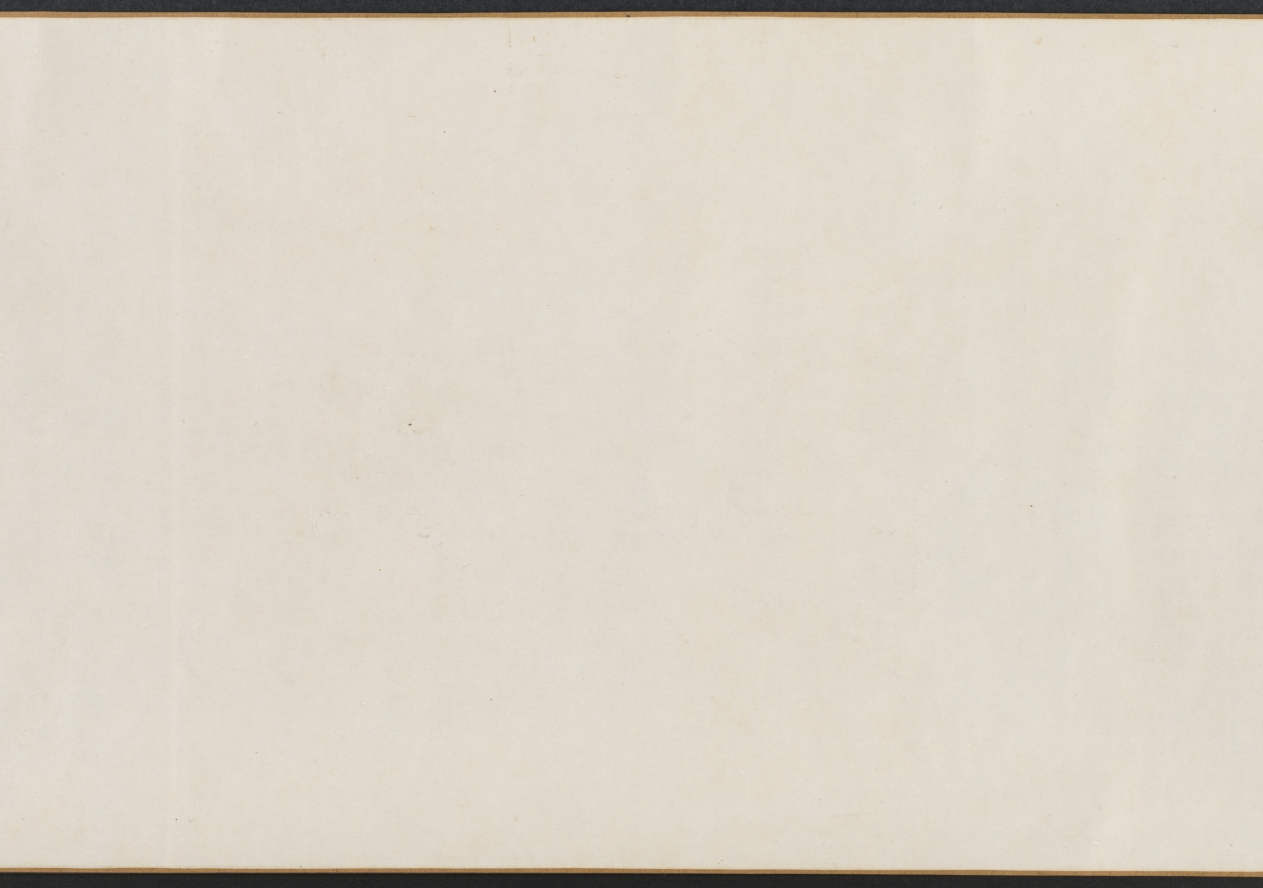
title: The Nine Elders of the Mountain of Fragrance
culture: China, Ming dynasty (1368–1644)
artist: attributed to Xie Huan (Chinese, c. 1370-c.1450)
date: 1426–52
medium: handscroll, ink and color on silk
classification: Painting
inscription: 4 seals: 2 of Xiang Yuanbian 項元汴 (1525–1590); 1 of the Qianlong Emperor (r. 1736-95); 1 of C. C. Wang 王季遷 (1907–2003)